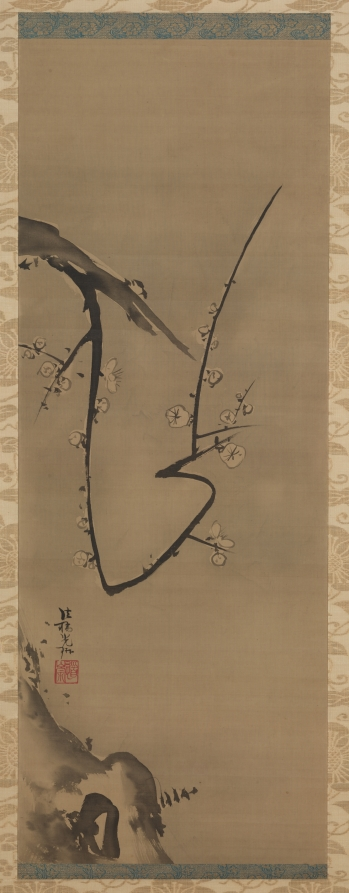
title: Plum Tree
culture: Japan, Edo period (1615–1868)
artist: Ogata Kōrin (Japanese, 1658–1716)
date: c. 1700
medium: hanging scroll; ink on silk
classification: Painting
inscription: Artist's signature and seal above hillock bottom right corner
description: Ogata Kōrin had to think through his design carefully to create these white plum blossoms and deliver their effect, as he used the reserve technique—where selected areas of the painting surface are left unpainted—to achieve it. He probably roughed in the tree before applying an ink wash to the entire silk surface, except where he intended to place the flowers. He likely then returned to articulate the petals and, in some cases, the pistils and stamens. The composition shows the tree twisting out of view, only to return with a branch of new growth jabbing forth from an old, broken limb, thereby heightening the visual impact of the blossoms.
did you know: The Rinpa style of painting is named for Ogata Kōrin, even though he did not create it.